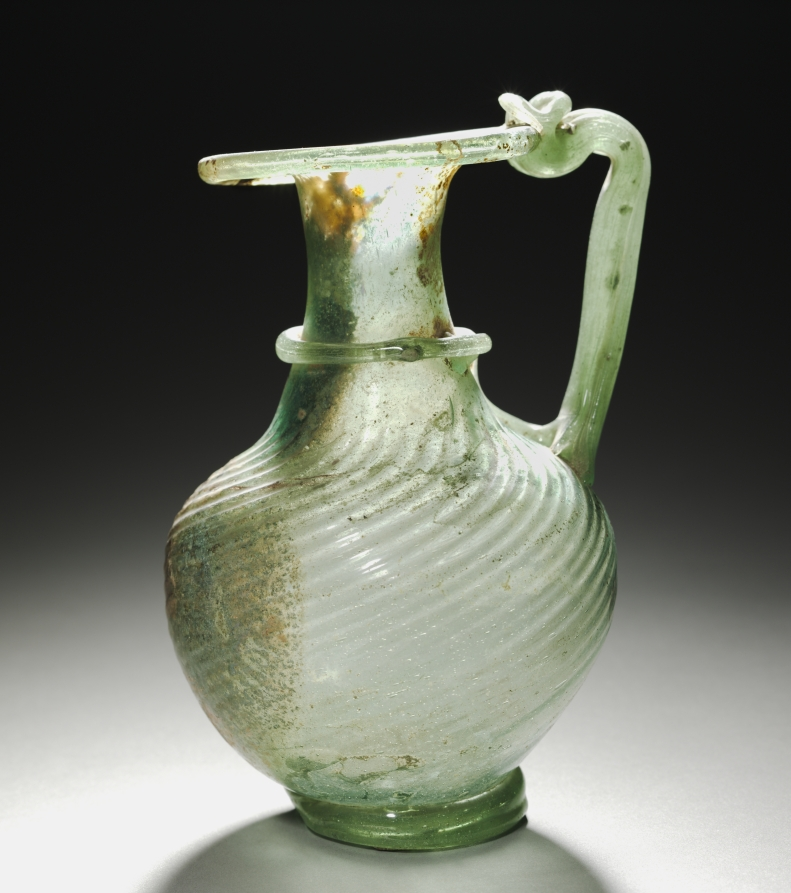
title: Pitcher with Handle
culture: Eastern Mediterranean, Roman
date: 300s CE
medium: glass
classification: Glass